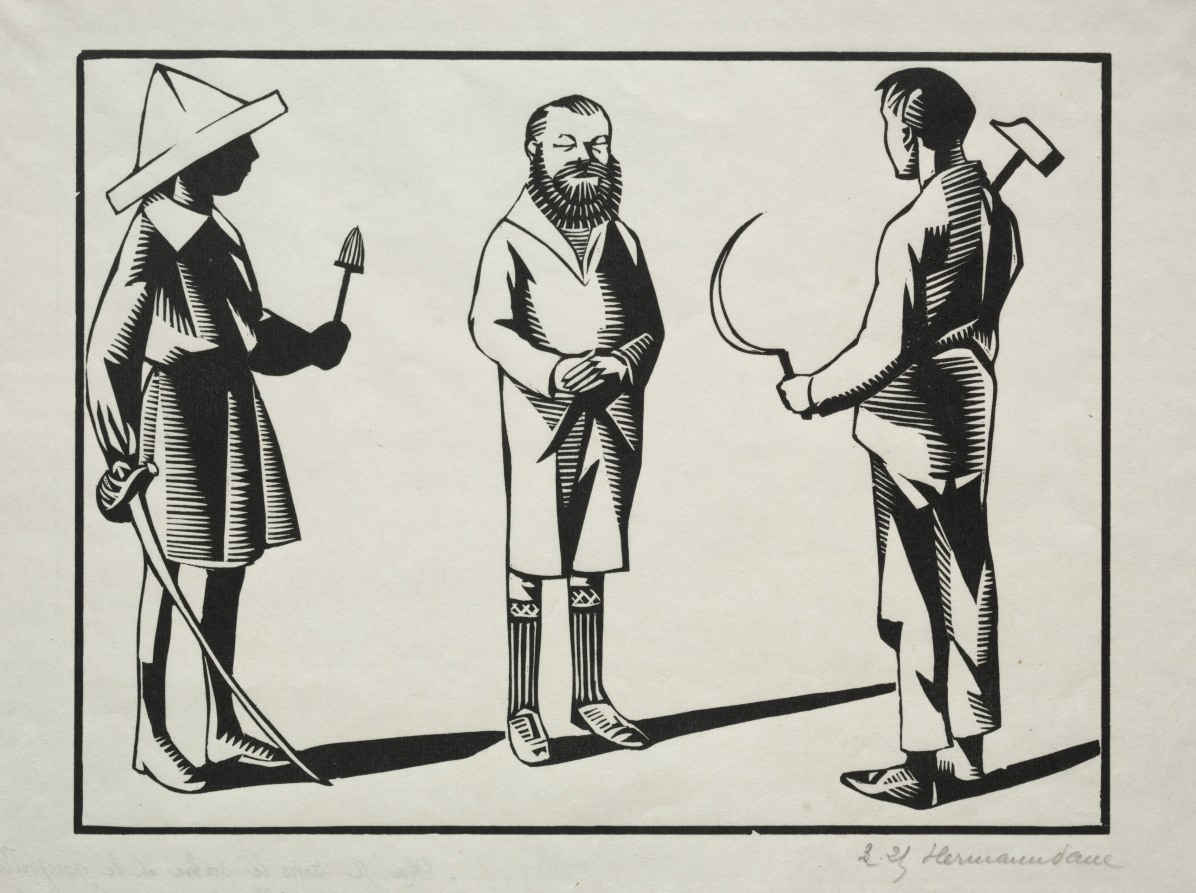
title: Moi! je tiens le sabre, et le goupillon; toi la faucille, le marteau et ler pastel. C'est la barbe.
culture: France, 20th century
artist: Hermann Paul (French, 1864–1940)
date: c. 1920s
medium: woodcut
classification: Print